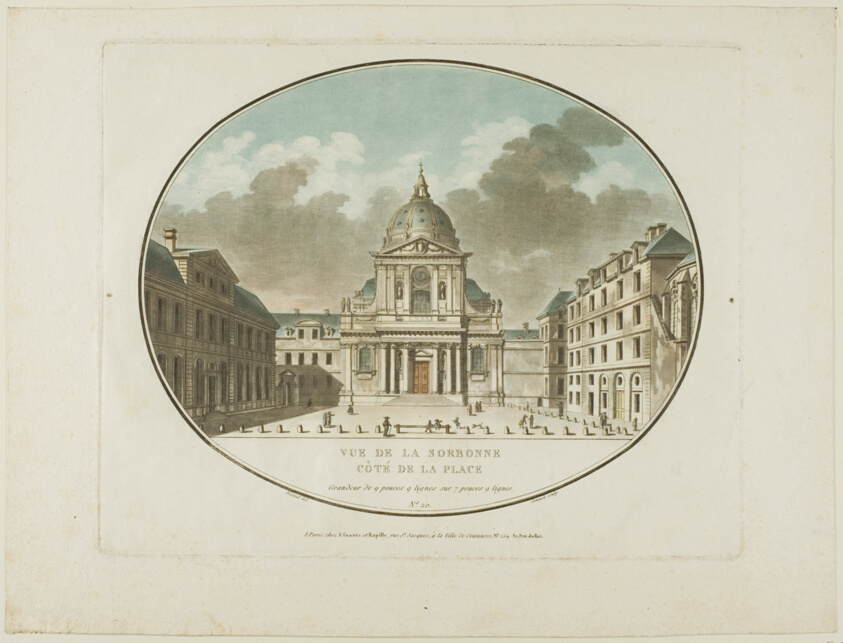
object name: Print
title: View of the Sorbonne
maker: Jean-François Janinet; French, 1752-1814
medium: Aquatint on paper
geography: France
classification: aquatint; print; prints and drawing